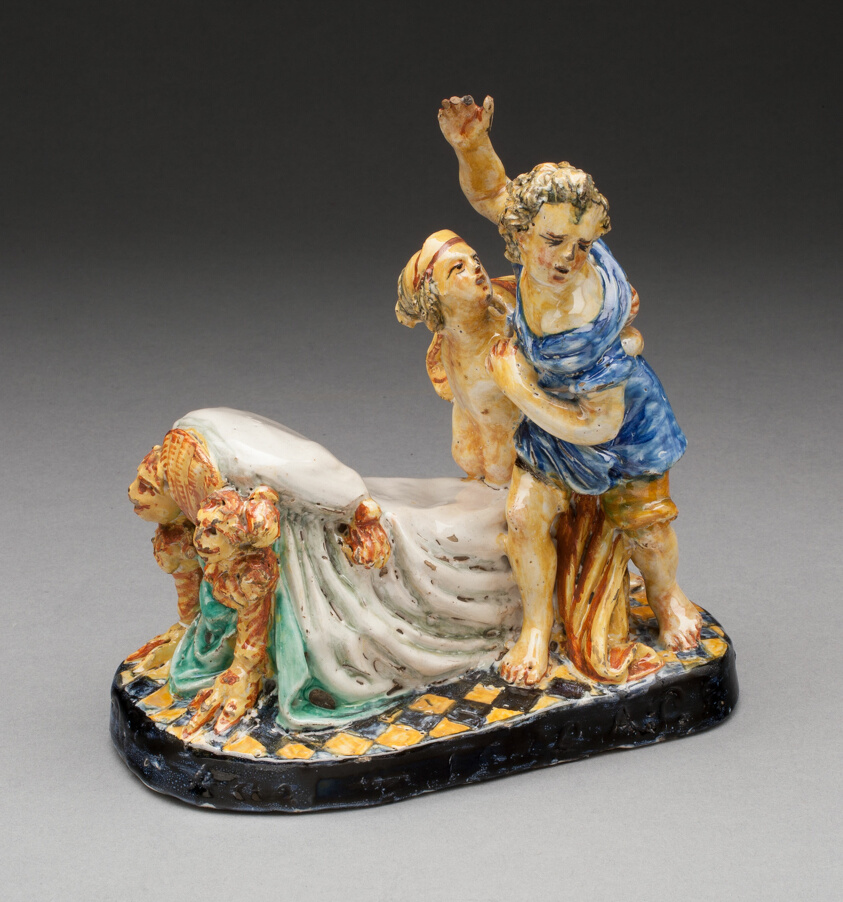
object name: Ceramics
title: Joseph and Potiphar's Wife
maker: Italy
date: 1610/70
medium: Tin-glazed earthenware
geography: Central Italy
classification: earthenware; ceramics; european decorative arts